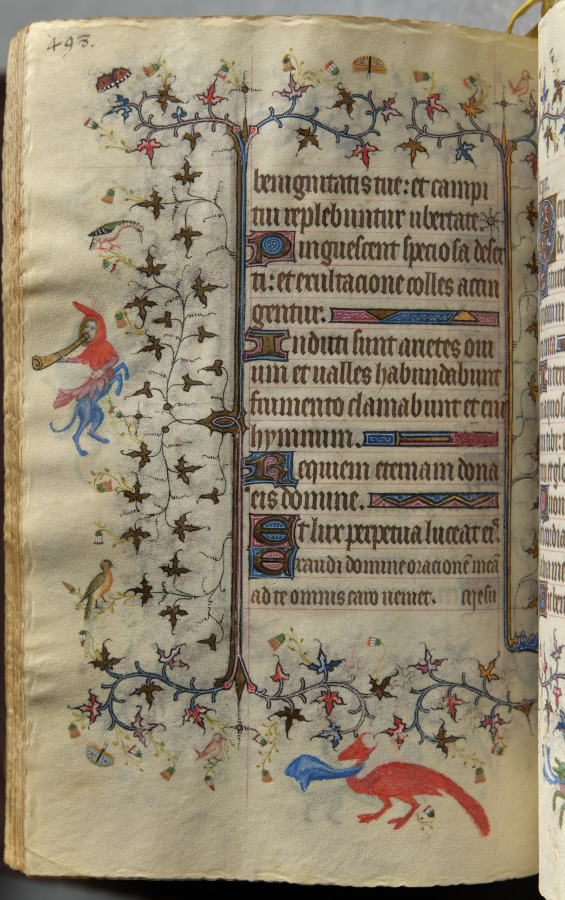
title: Hours of Charles the Noble, King of Navarre (1361-1425): fol. 243v, Text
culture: France, Paris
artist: Master of the Brussels Initials and Associates (French)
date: c. 1405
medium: ink, tempera, and gold on vellum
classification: Bound Volume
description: This precious volume was obviously highly prized by its owner, the French-born King of Navarre, who had his coat of arms painted on no less than twenty folios. Rather than directly commissioning this manuscript from a specific workshop, it seems that Charles the Noble acquired his book of hours -- perhaps ready-made for the luxury market -- while on a trip to Paris in 1404-05. A collaborative effort, six painting styles are evidenced within the pages of this codex, those of two Italians, two Frenchmen, and two Netherlanders. The painter who was responsible for the planning and decoration of the book, and who produced seventeen of the large miniatures, was a Bolognese artist known as the Master of the Brussels Initials. His principal assistant, responsible for most of the borders, was a Florentine who signed his name "Zecho" da Firenze on folio 208 verso.